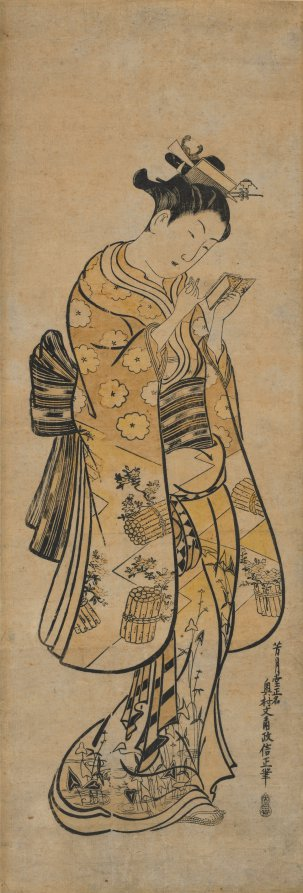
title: A Beauty with a Mirror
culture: Japan, Edo period (1615–1868)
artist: Okumura Masanobu (Japanese, 1686–1764)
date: c. 1743–46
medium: woodblock print with hand-coloring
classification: Print